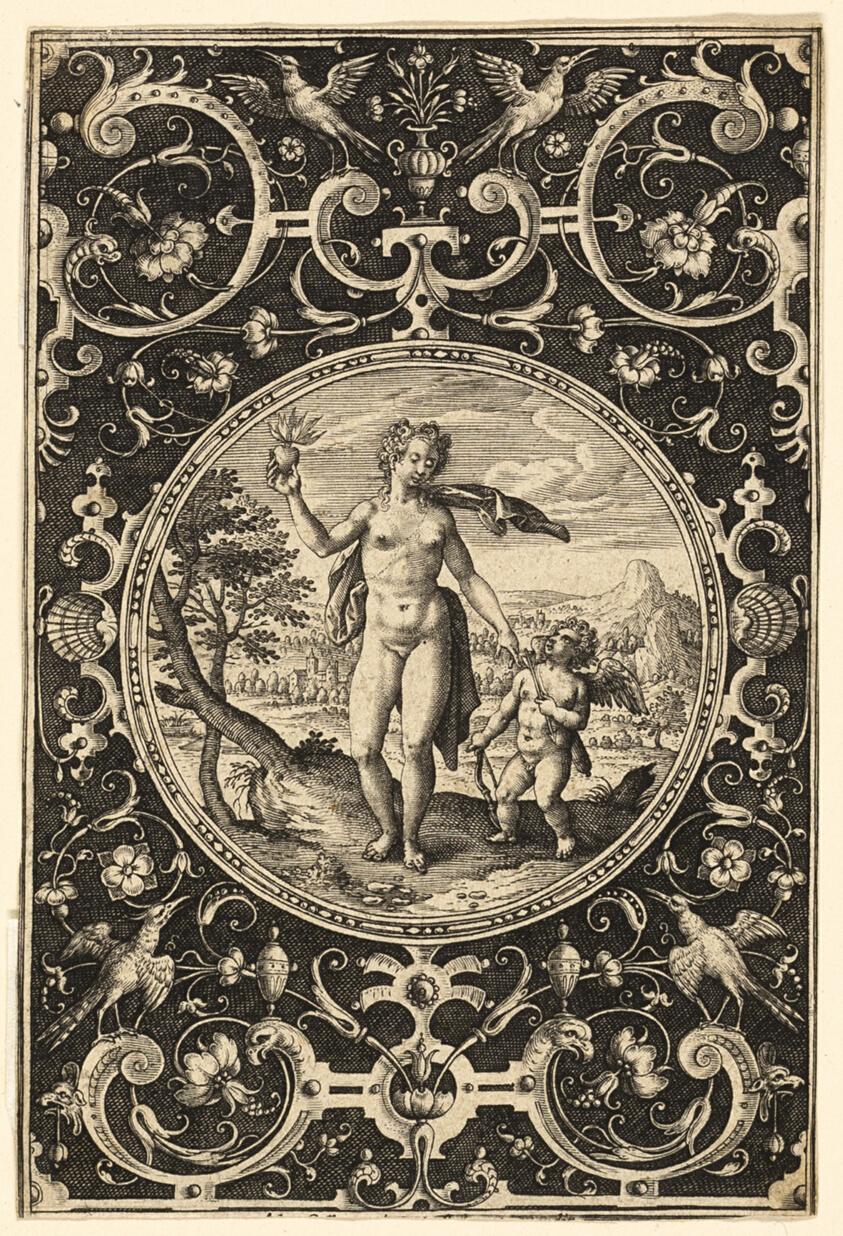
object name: Print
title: Venus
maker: Adriaen Collaert, II; Flemish, 1560-1618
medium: Engraving on paper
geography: Flanders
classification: engraving; print; prints and drawing